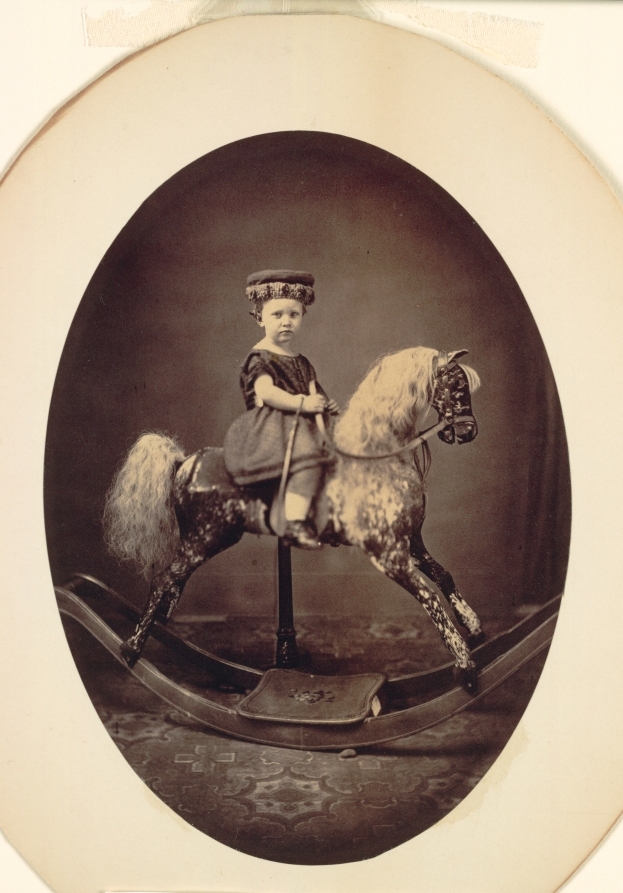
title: Francis Wayland Sherman at the Age of 2 Years 10 Months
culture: America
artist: H.N. Roberts (American, active 1860s)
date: 1862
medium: albumen print from wet collodion negative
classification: Photograph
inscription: written in brown ink on verso: "Francis Wayland Sherman/ Taken at the age of 2 yrs + 10 mos."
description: An inscription on the back of this photograph records the sitter’s identity and age. Because he belonged to a prominent family, it was possible to learn through research that he grew up in Ludlow, Vermont, the son of a successful businessman with pharmaceutical and music enterprises that he later managed. The rocking horse, a favorite toy of Victorian nurseries, may have belonged to the wealthy child or have been a prop in the photographer’s studio. This is an especially luxurious example. Dappled gray rocking horses were the most popular in that era, having been favored by Queen Victoria for her children’s nursery.